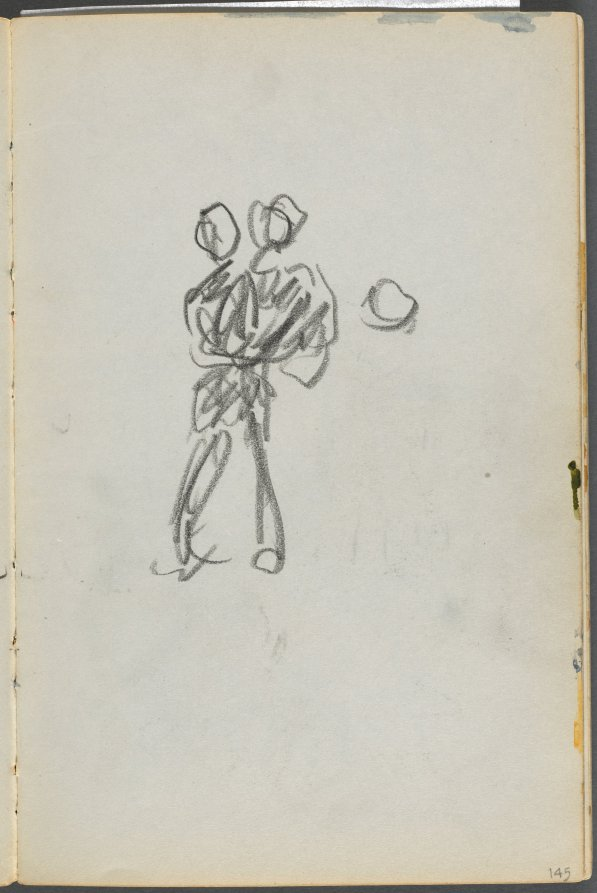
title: Sketchbook, The Dells, N° 127, page 145: Figures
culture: America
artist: Maurice Prendergast (American, born Newfoundland [now Canada], 1858–1924)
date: c. 1919–1921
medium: graphite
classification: Bound Volume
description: This sketchbook contains 59 pages of graphite drawings and 16 watercolors made at various locations on Cape Ann, Massachusetts.